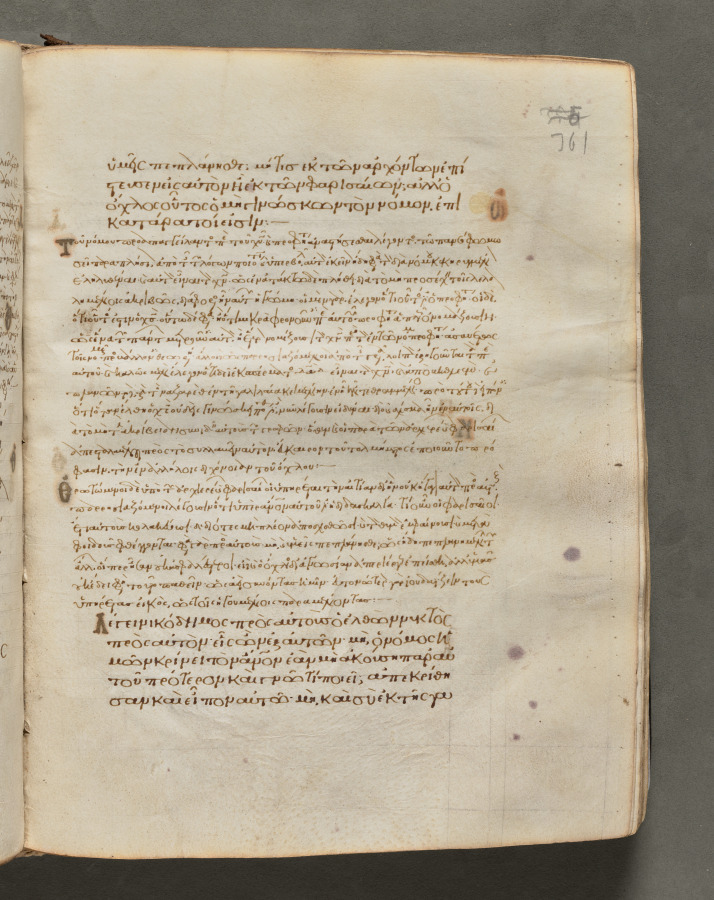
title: Text, folio 361 (recto), from a Gospel Book with Commentaries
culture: Byzantium, Constantinople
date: c. 1000–1100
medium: ink, tempera, and gold on vellum; leather binding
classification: Bound Volume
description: Each of the four gospels in this book opens on a page with brilliantly illuminated borders depicting the author of the text as well as birds—principally peacocks, symbols of the immortality of the soul—and fountains, representing the fountain of life and the salvation of the soul. This volume consists of 428 leaves with texts in Greek. Its level of sophistication suggests that it was probably written and decorated in a monastery in Constantinople.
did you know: Gospel books were carried in procession through Byzantine churches.